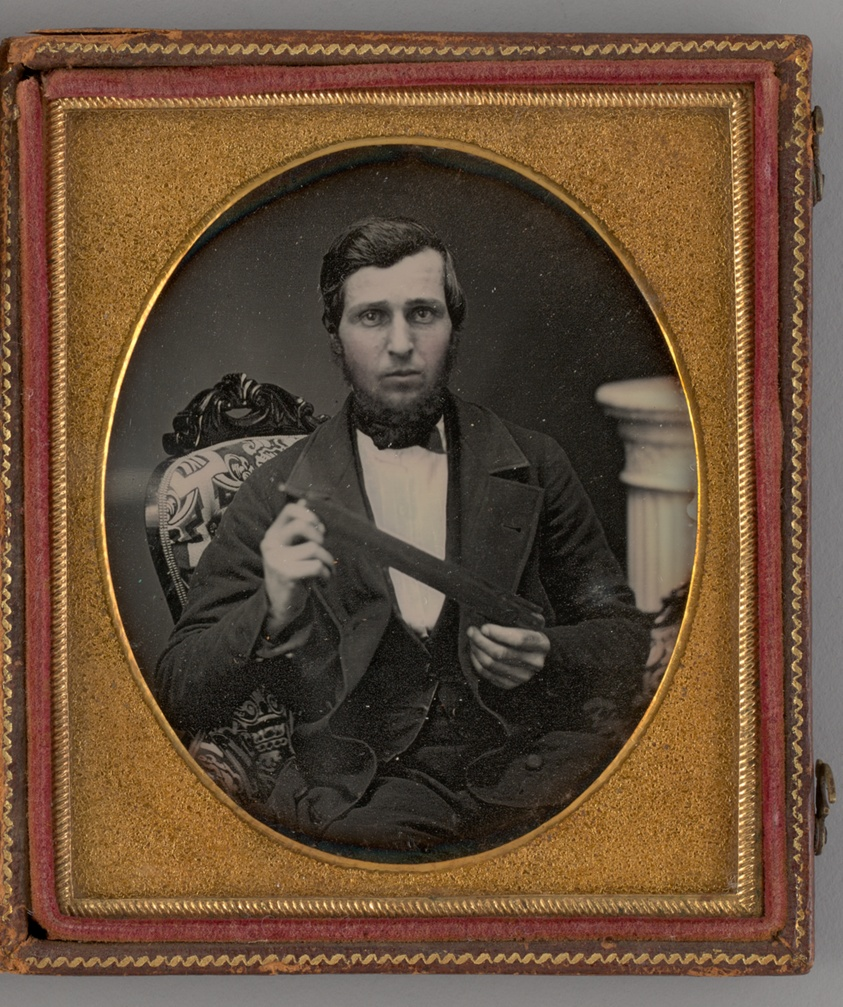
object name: Photograph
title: Untitled (Portrait of a Man)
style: 19th century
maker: Unknown maker; American, 19th century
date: 1855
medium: Daguerreotype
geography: United States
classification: portrait; photograph; daguerreotype; portrait; photographic process; photography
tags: lundberg collection, Male, photography, portrait, portraits, portraits: male subject